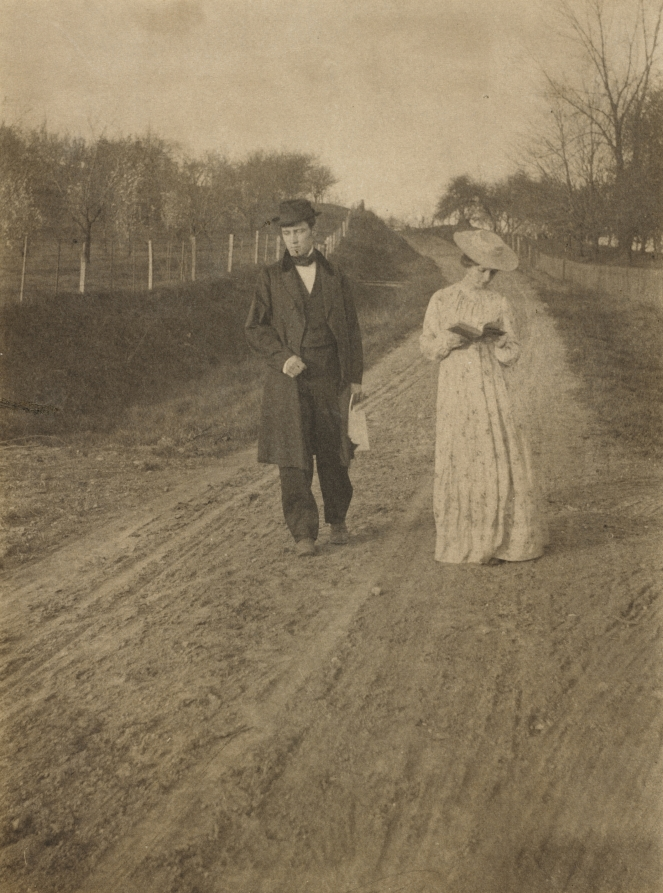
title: Illustration for "Beneath the Wrinkle" (Frank Webb and Julia Hall McCune)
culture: America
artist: Clarence H. White (American, 1871–1925)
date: 1903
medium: platinum print with pencil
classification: Photograph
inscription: Written in pencil on recto of original mount: "Clarence H. White [signed] '03"; in pencil on verso of photograph: "Frank Webb / Julia McCune / Photo by Clarence White / An Illustration for a story"; written in pencil on verso of mount: "32 [circled]"